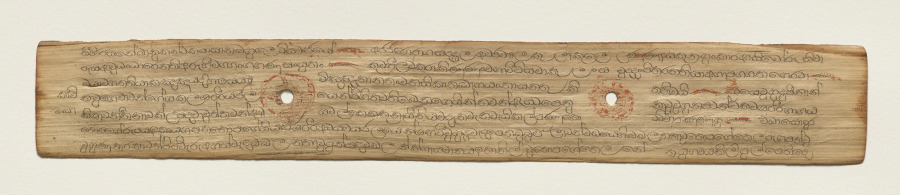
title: Leaf from a Buddhist Manuscript (recto)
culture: Sri Lanka, Singhalese, Late 17th century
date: c. 1700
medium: fiber paper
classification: Manuscript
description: Palm leaf material is still used for manuscripts in Sri Lanka. The palm leaves are prepared first by boiling them, drying them in the sun, and then rubbing them with oils. Scribes then use a metal stylus to incise the text. Then charcoal powder is wiped across the pages, filling in only the inscribed lines.